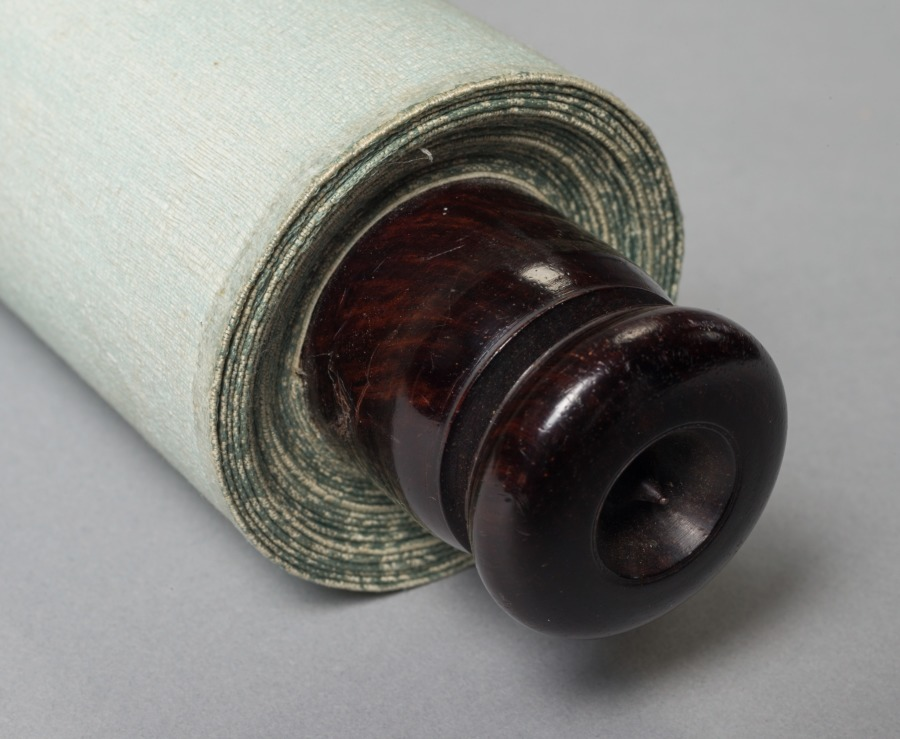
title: Landscape with Gentle Peaks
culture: Japan, Edo period (1615–1868)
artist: Kan Tenju (Japanese, 1727–1795)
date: 1767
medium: hanging scroll; ink and light color on paper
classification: Painting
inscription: 雨過嵐光煙／雲陽樹影諫／夕陽独在左／？卷讀残書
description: A figure sits in a retreat tucked into the mountains near a waterfall. The painter, Kan Tenju, was best known as a calligrapher and seal carver. Of Korean heritage, he was a patron of artist Ike Taiga (池大雅) (1723–1776), and a cousin of Taiga’s student Aoki Shukuya (青木 夙夜) (died 1802). His Chinese-style poem reads as follows: Smoky mist in the mountain reflects light after the rain, Sunlight passes through the clouds to cast shadows of the trees, Alone in the sunset, I read a well-worn book.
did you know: This painting combines image and calligraphy, connected by skillful brushwork.